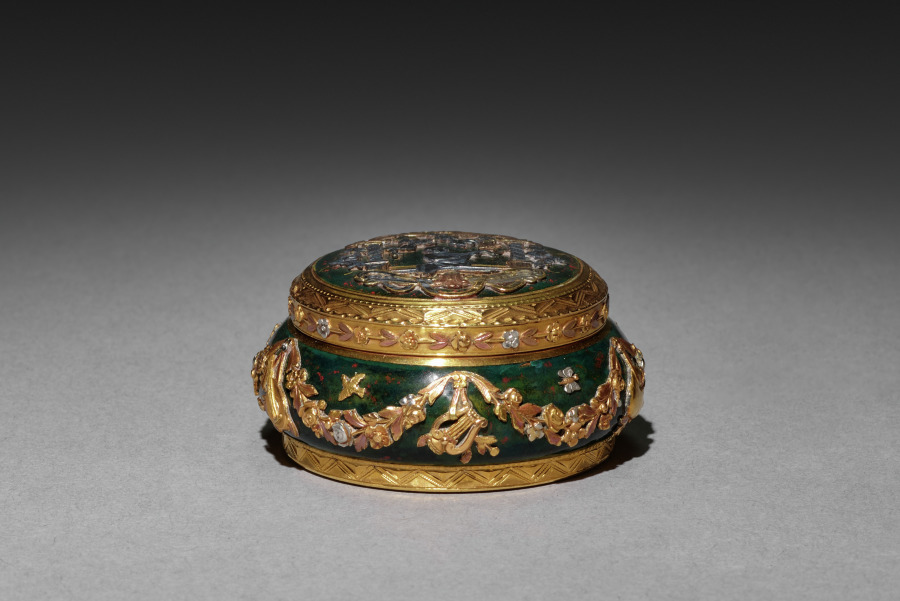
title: Bonbonniere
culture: France, 19th century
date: 1850–1899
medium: bloodstone (?) mounted in colored golds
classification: Miscellaneous